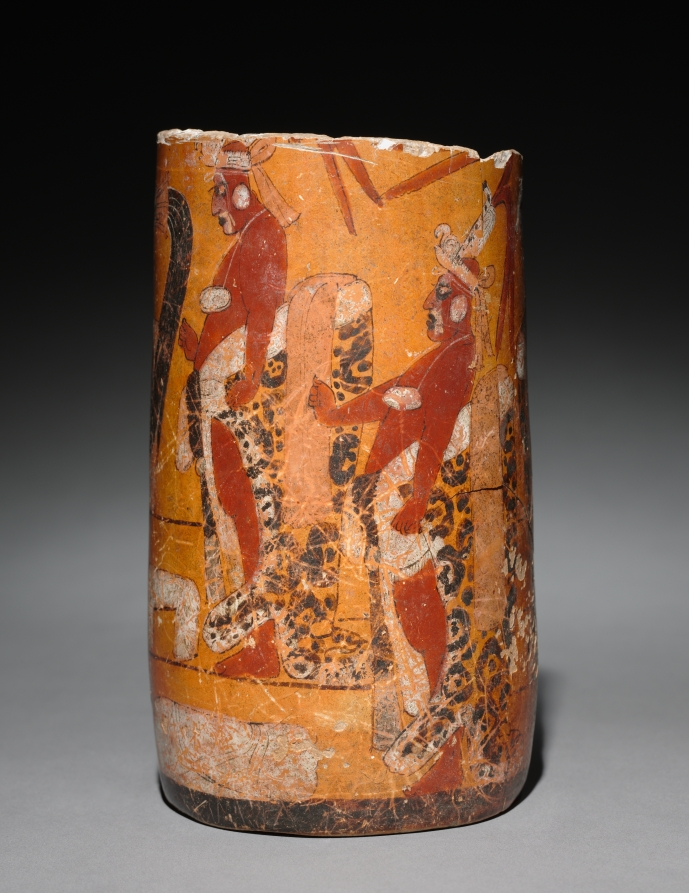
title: Cylindrical Vessel with Palace Scene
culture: Mexico or Central America, Maya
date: 600–900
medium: earthenware with colored slips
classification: Ceramic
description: The scene here may commemorate a special event in the life of a Maya ruler, who stands on a stairway before his throne, his legs framed by a litter on the ground. His gesture and the jaguar pelt at the waist visually unify him with his attendants. The ruler perhaps used the vessel as a drinking cup on important occasions; fine ceramics also served as gifts and as offerings in tombs.